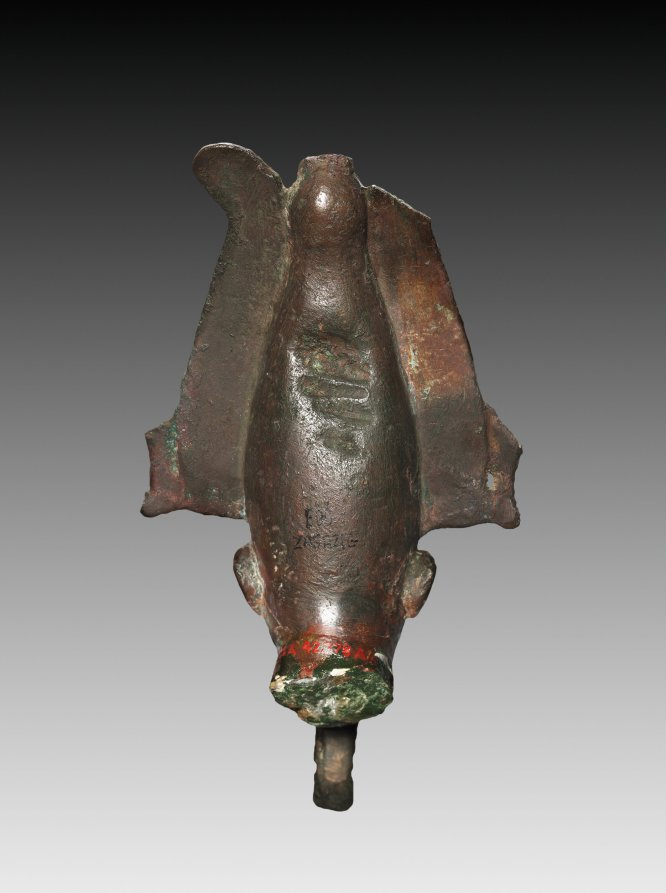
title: Head of Osiris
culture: Egypt, Late period (715–332 BCE), Dynasty 26 or later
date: 664–525 BCE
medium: bronze, hollow cast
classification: Sculpture